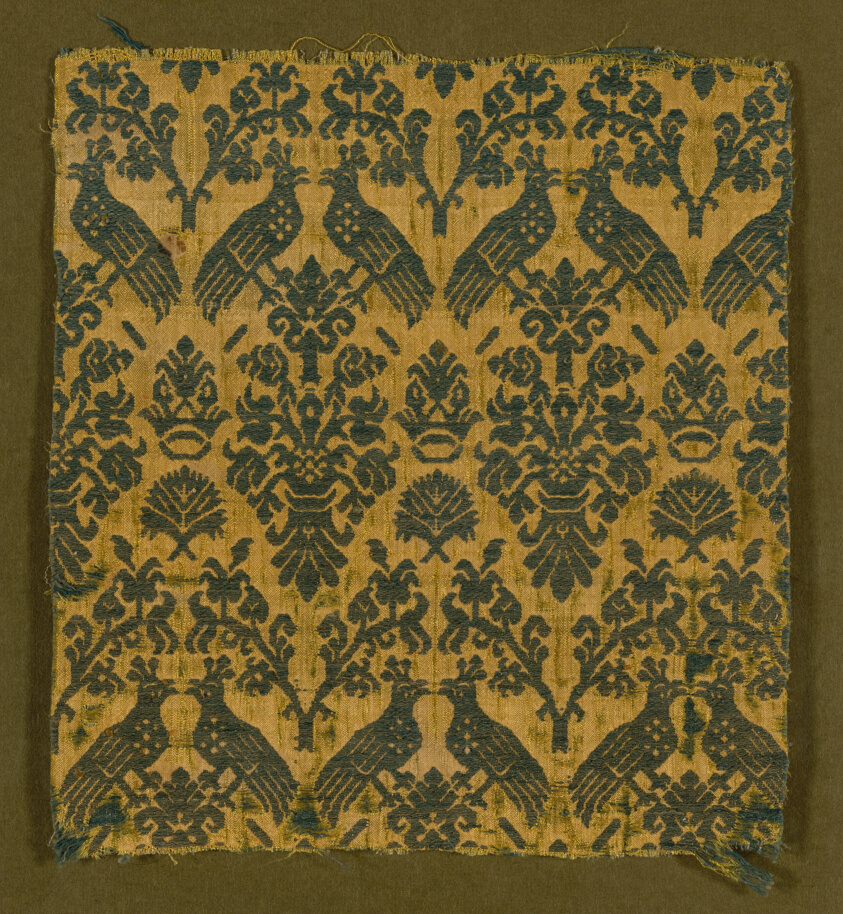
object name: Textile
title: Fragment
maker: Spain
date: 1600/50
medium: Silk and cotton, plain weave; tied and free double cloth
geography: Spain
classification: textile; weaving